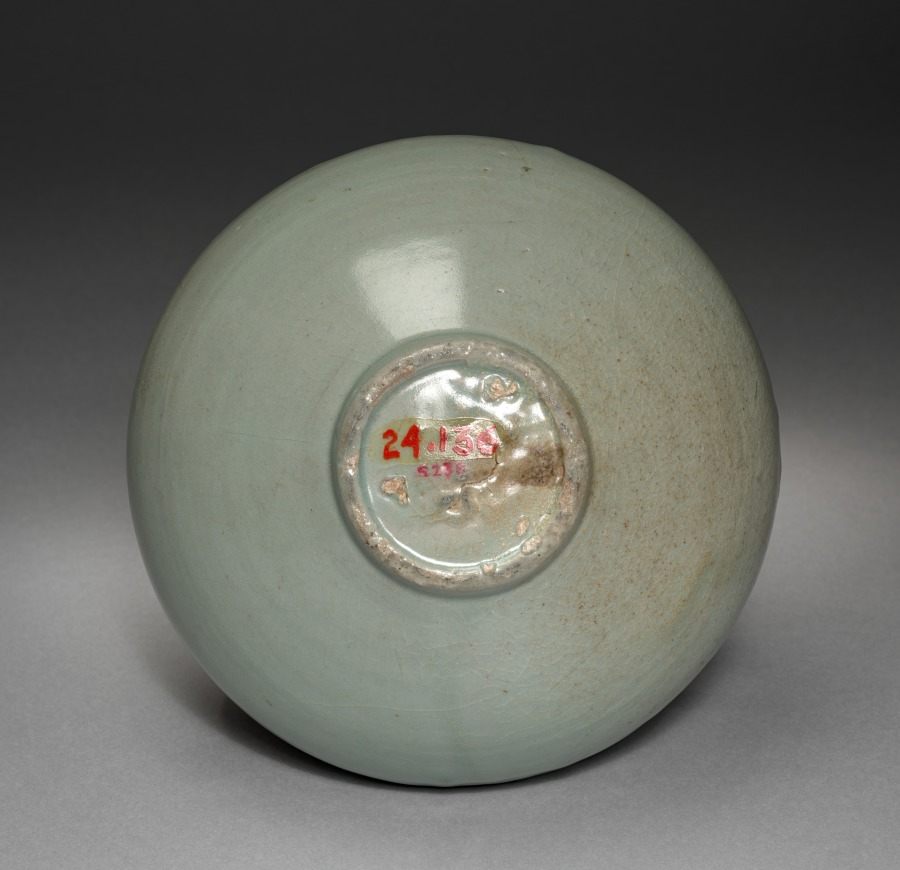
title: Bowl with Incised Parrot Design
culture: Korea, Goryeo dynasty (918–1392)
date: 1100s-1200s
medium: glazed porcelain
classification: Ceramic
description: As early as the 600s, the practice of drinking tea and wine became an important part of elite leisure culture in Korea. A wide bowl like this example was especially suitable for drinking powdered tea shaved from a compressed tea cake, the most commonly enjoyed type during the Goryeo period. The image of flying parrots inscribed on the inner wall of this tea bowl may have made the moment of drinking tea much enjoyable.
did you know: On the base of this tea bowl, three small spur marks made of bits of clay remain visible, indicating an individual protective casing of fire clay (saggar).